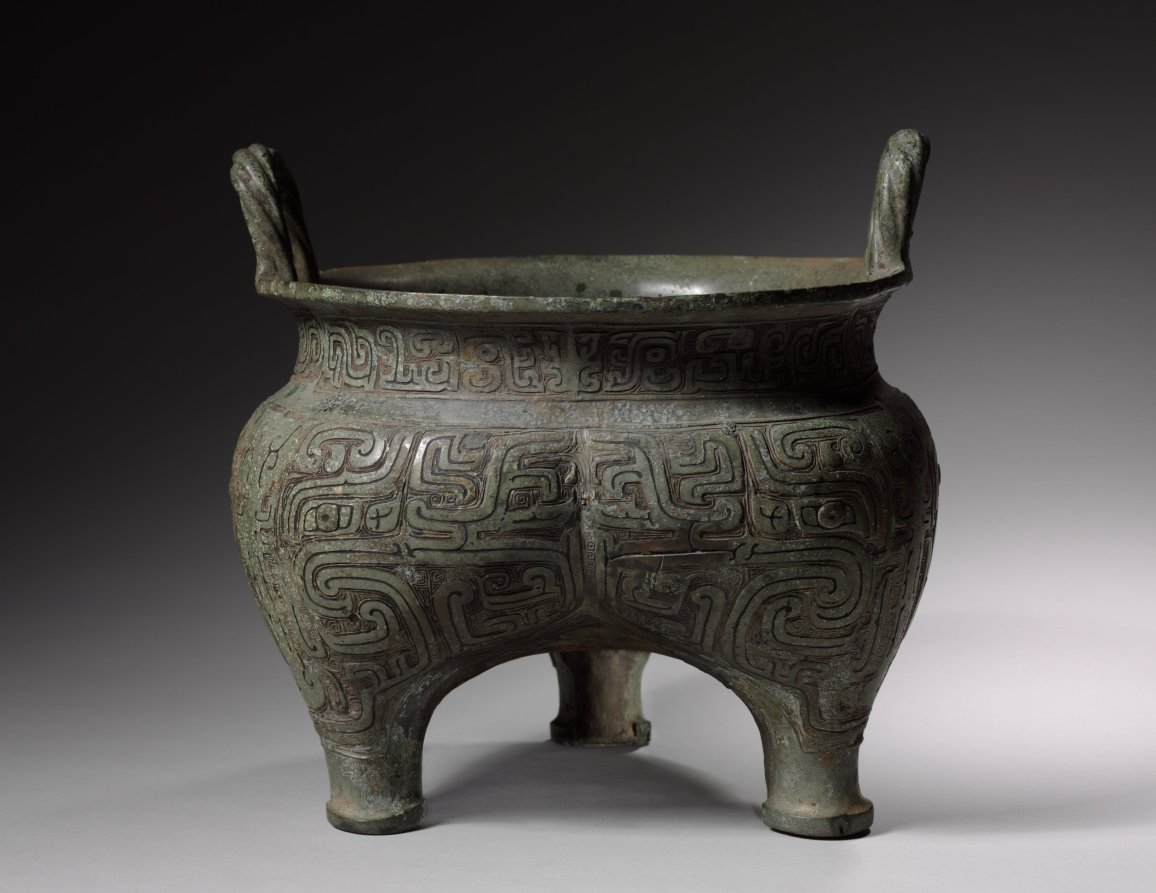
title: Hollow-Legged Tripod (Li Ding)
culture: China, Shaanxi province, Xi'an, Western Zhou dynasty (c. 1046–771 BCE)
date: late 900 BCE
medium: bronze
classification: Metalwork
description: This food vessel exhibits a new decorative trend of metropolitan Western Zhou foundries. Zoomorphic images became increasingly abstract and subject to linear elaboration. The dominating animal mask (taotie) of the Shang is here transformed, dissolved, and dissected into intricate patterns of curving bands and median grooves. The design is abstract but not devoid of symbolic contents and functions. A smooth and even gray-green patina--the result of natural corrosion during burial--covers the outside and creates a new visual impact on the surface decoration.